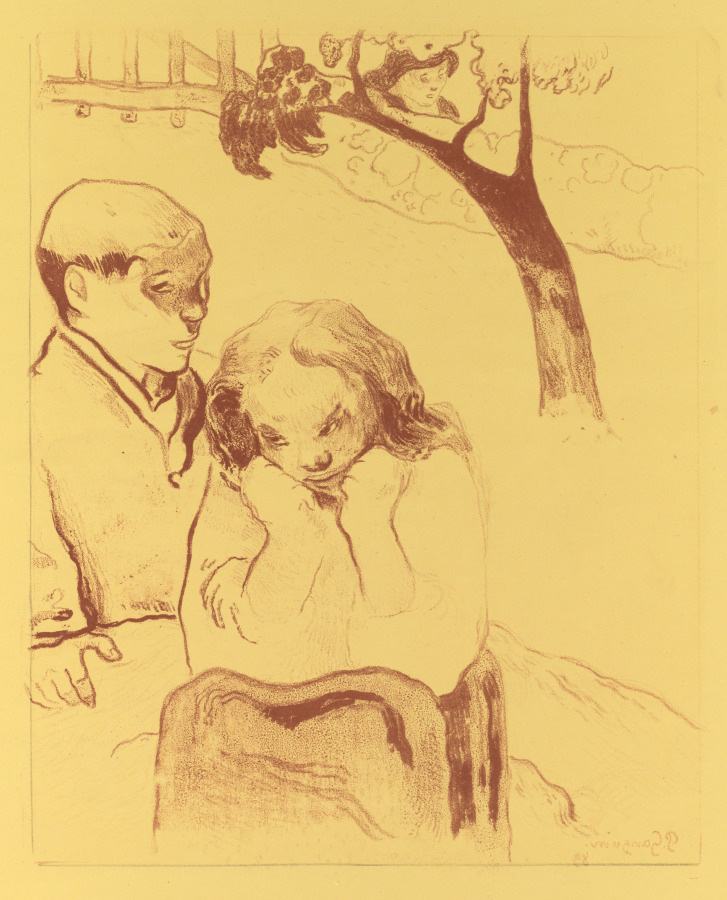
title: Volpini Suite: Human Misery (Misères Humaines)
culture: France, 19th century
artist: Paul Gauguin (French, 1848–1903)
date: 1889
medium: zincograph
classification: Print